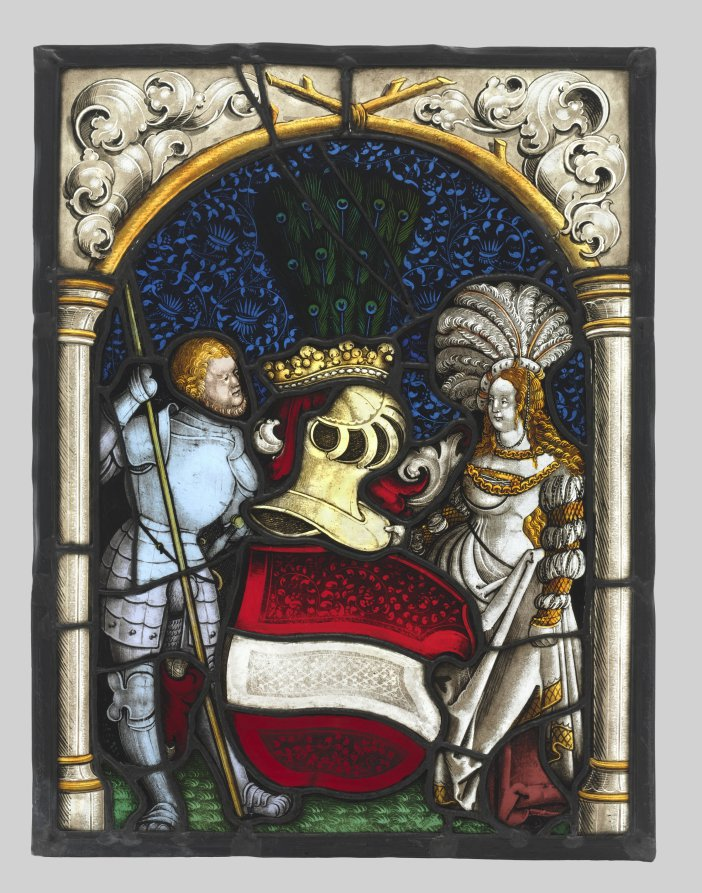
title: Heraldic Panel Depicting a Knight and a Lady with the Arms of the Archduchy of Austria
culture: Switzerland, Germany, or Austria, 16th century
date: c. 1515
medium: white glass with silver stain, sanguine, and pot metal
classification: Glass